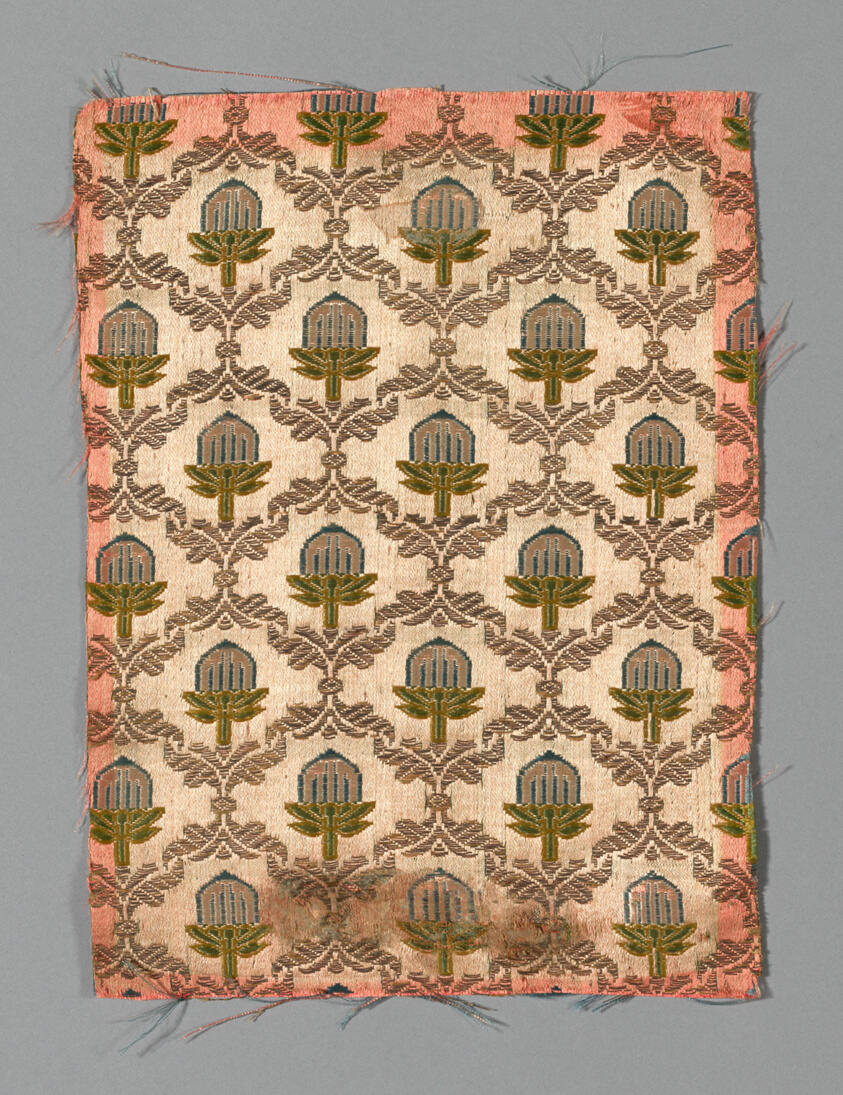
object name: Textile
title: Fragment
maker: India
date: 19th century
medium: Brocaded Satin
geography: India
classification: textile; weaving